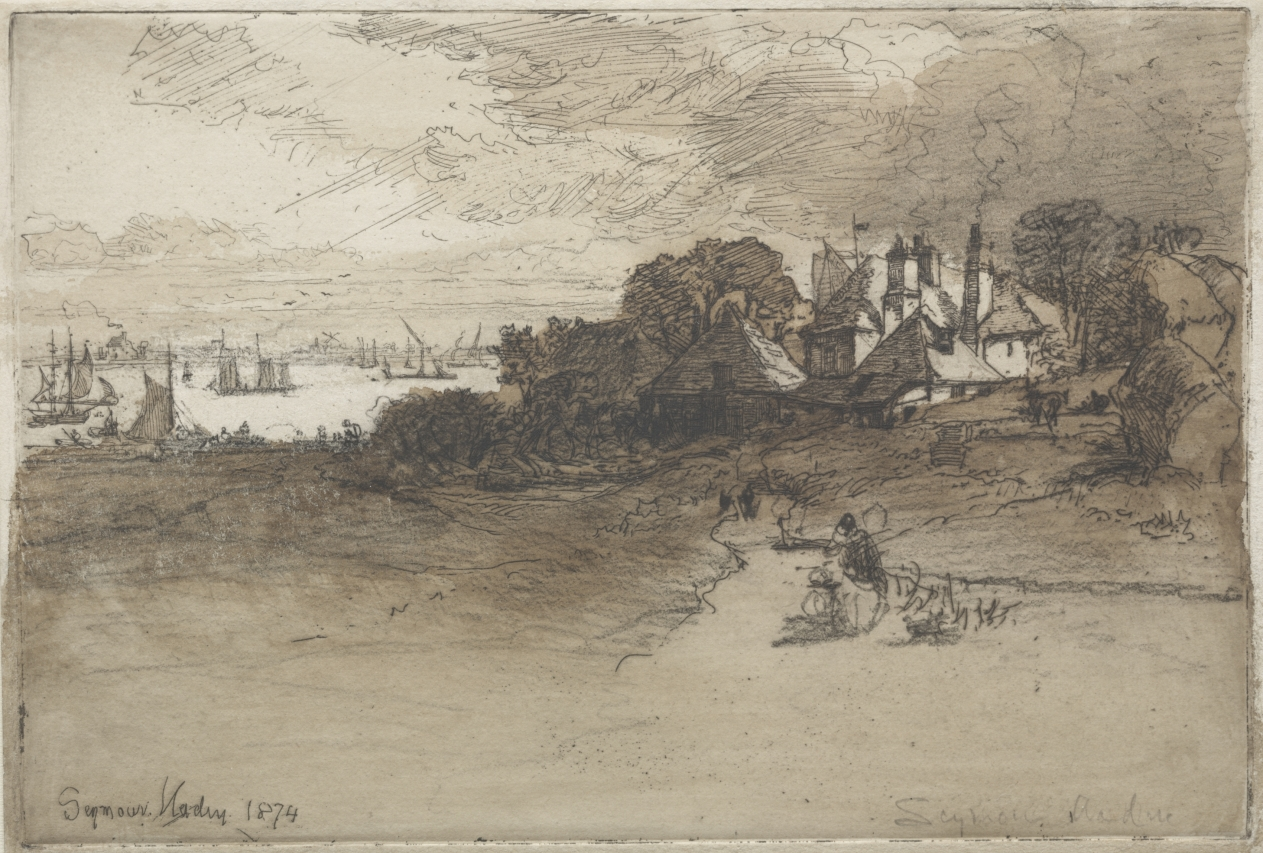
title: An Essex Farm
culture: England, 19th century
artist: Francis Seymour Haden (British, 1818–1910)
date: 1874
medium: etching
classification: Print